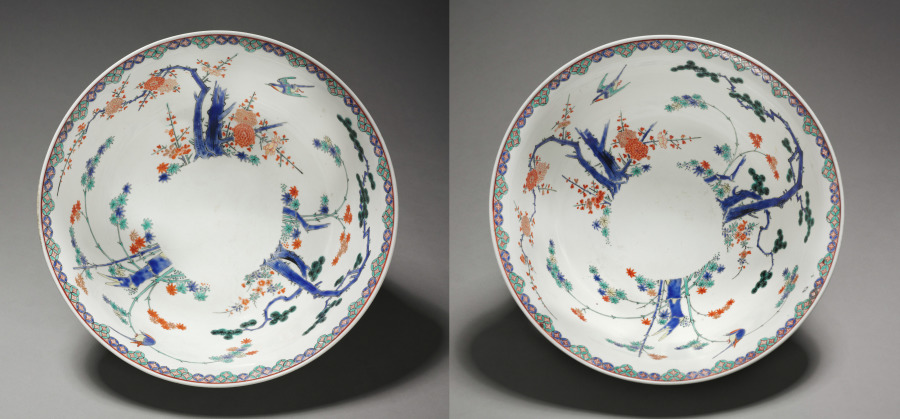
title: Pair of Bowls: Kakiemon Ware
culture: Japan, Edo period (1615–1868)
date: late 1600s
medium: Imari ware porcelain with overglaze enamel and gold decoration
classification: Ceramic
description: The Chinese style of decoration identifies this bowl as a product made for the markets in England, Holland, France, and Germany. Here, kakiemon potters rearranged the Chinese literati motifs of the plum, pine, and bamboo. Such kakiemon ware inspired domestic porcelain production in Europe in the 1700s–1800s.